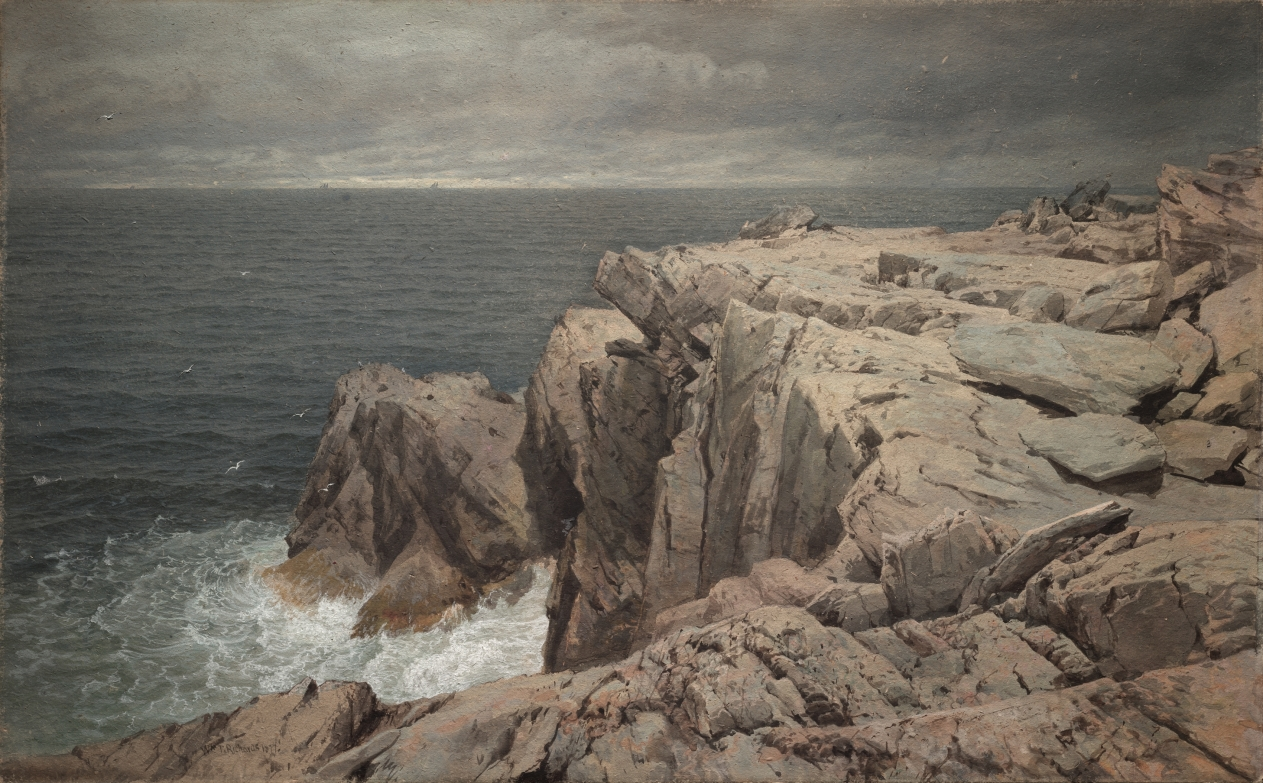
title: Cormorant Cliff, Jamestown, Rhode Island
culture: America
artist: William Trost Richards (American, 1833–1905)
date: 1877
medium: watercolor and gouache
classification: Drawing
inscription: signed, lower left, in black ink: Wm [m is underlined] T. Richards 1877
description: As a young artist, Richards was influenced by John Ruskin’s Modern Painters. Richards’s interest in Ruskin was particularly reflected in the younger artist’s meticulous geological studies made directly from nature. Richards strove for the fidelity to nature that he saw in the Pre-Raphaelite paintings exhibited in a show of British art at the Pennsylvania Academy in 1858. He is best known for his seascapes. Like the Impressionists, he was interested in capturing natural light and reflections on water and wet beaches, but his handling was tighter and his palette more tonal.